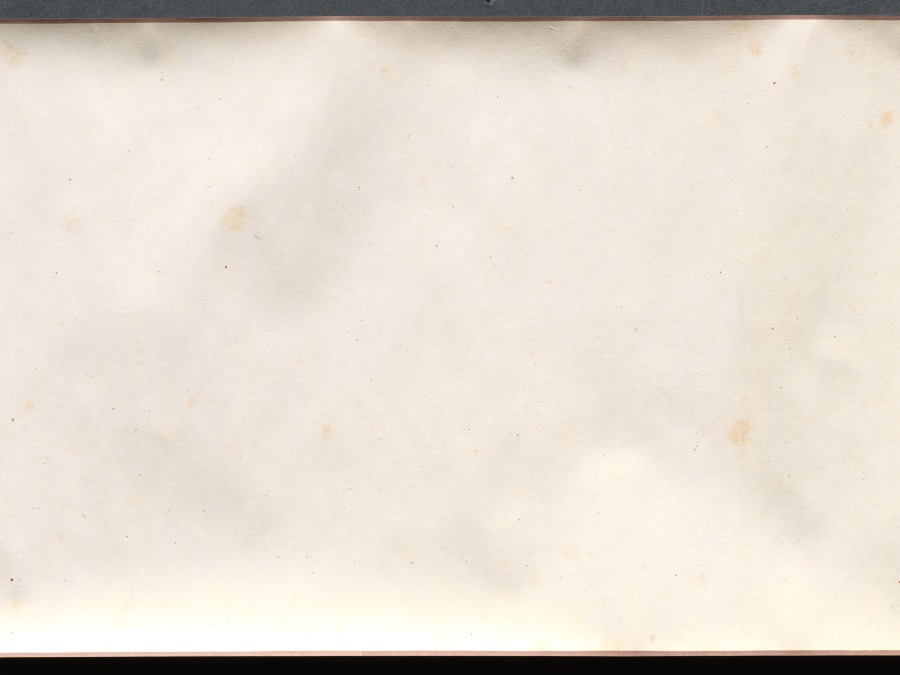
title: Four Poems: Calligraphy in Cursive Script (xingshu)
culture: China, Ming dynasty (1368–1644)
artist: Chen Jiru (Chinese, 1558–1639)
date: 1500s-1600s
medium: handscroll; ink on gold speckled paper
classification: Calligraphy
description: Written in graceful calligraphy with well-composed characters, the artist communicates his thoughts and state of mind in four poems. Characters written in dark, thick strokes convey rhythm, and indicate the moment after the writer had paused to recharge his brush with ink. Chen Jiru was a native of Huating (modern Shanghai). His calligraphy style resembles that of his friend, influential calligrapher Dong Qichang (1555–1636). Unlike Dong, Chen did not pursue government service: he burned his Confucian robes, declined a summons to serve at court, and immersed himself in literature, calligraphy, and painting.